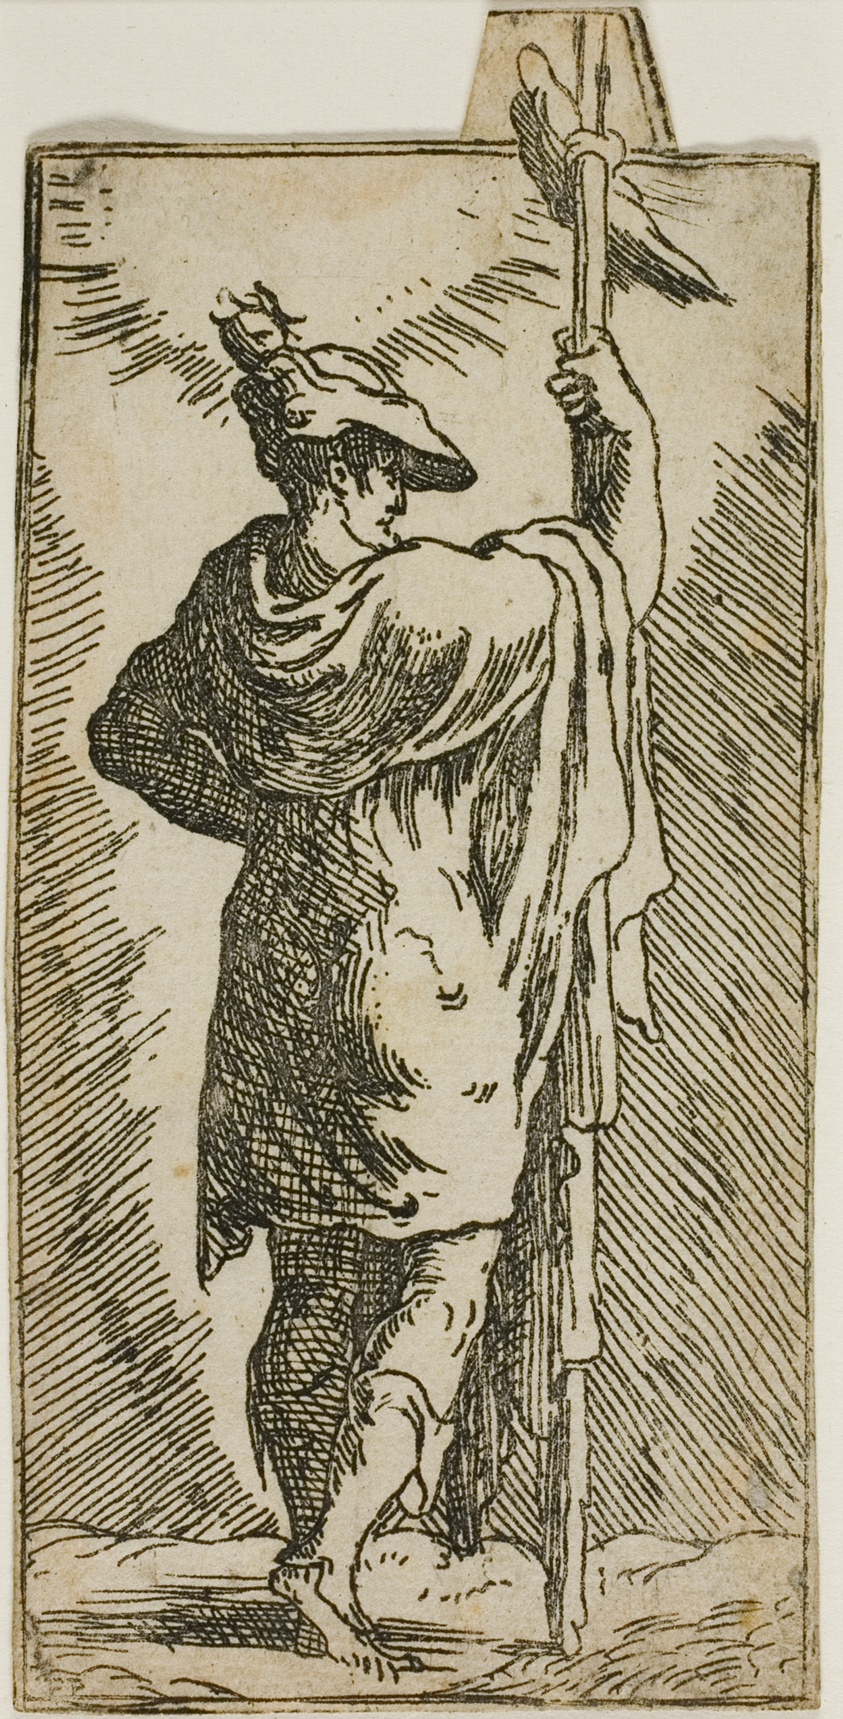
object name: Print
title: Saint James the Greater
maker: Master F.P. (Italian, c. 1530-1550); or after Girolamo Francesco Maria Mazzola, called Il Parmigianino (Italian, 1503-1540)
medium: Etching in black on cream laid paper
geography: Italy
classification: etching; print; prints and drawing